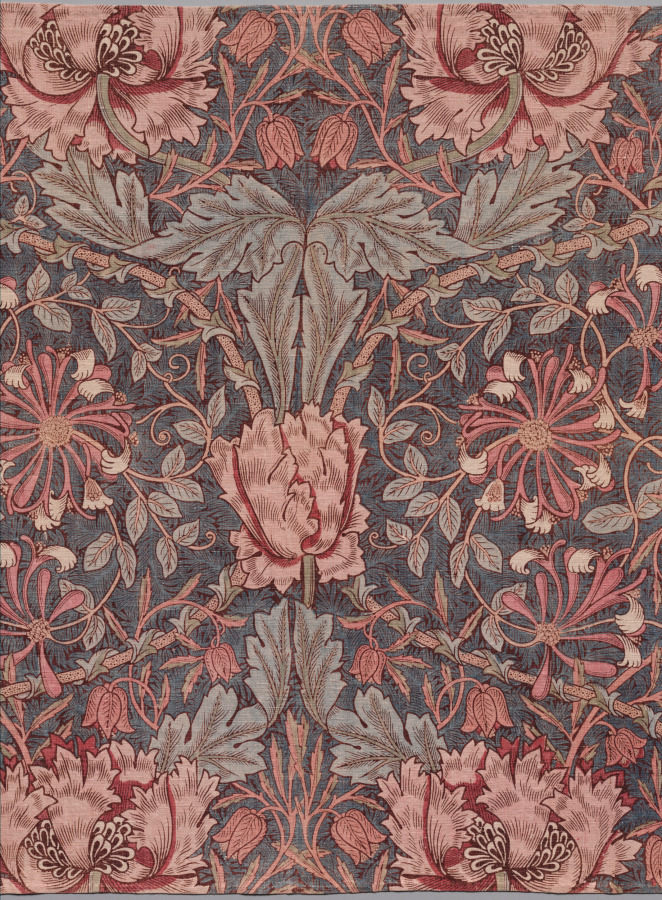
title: Honeysuckle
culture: England, Early 20th century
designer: William Morris (British, 1834–1896)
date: Early 20th century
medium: plain weave linen, printed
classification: Textile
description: William Morris’s daughter May called Honeysuckle “the most truly Morrisian in character of all his pattern-making . . . the most mysterious and poetic—the very symbol of a garden tangle.” Like many Morris textiles from this period, Honeysuckle has a mirrored pattern. At 29 3/4 inches high and 34 3/4 inches wide, this repeat was unusually broad, spanning almost the entire width of the loom. Morris believed that large patterns were more restful to the eye than small patterns, even when used to decorate modestly sized rooms. Designs from this period are a testament to the delight he took in his garden at Kelmscott Manor; he favored the charm of native English flowers above exotic specimens.